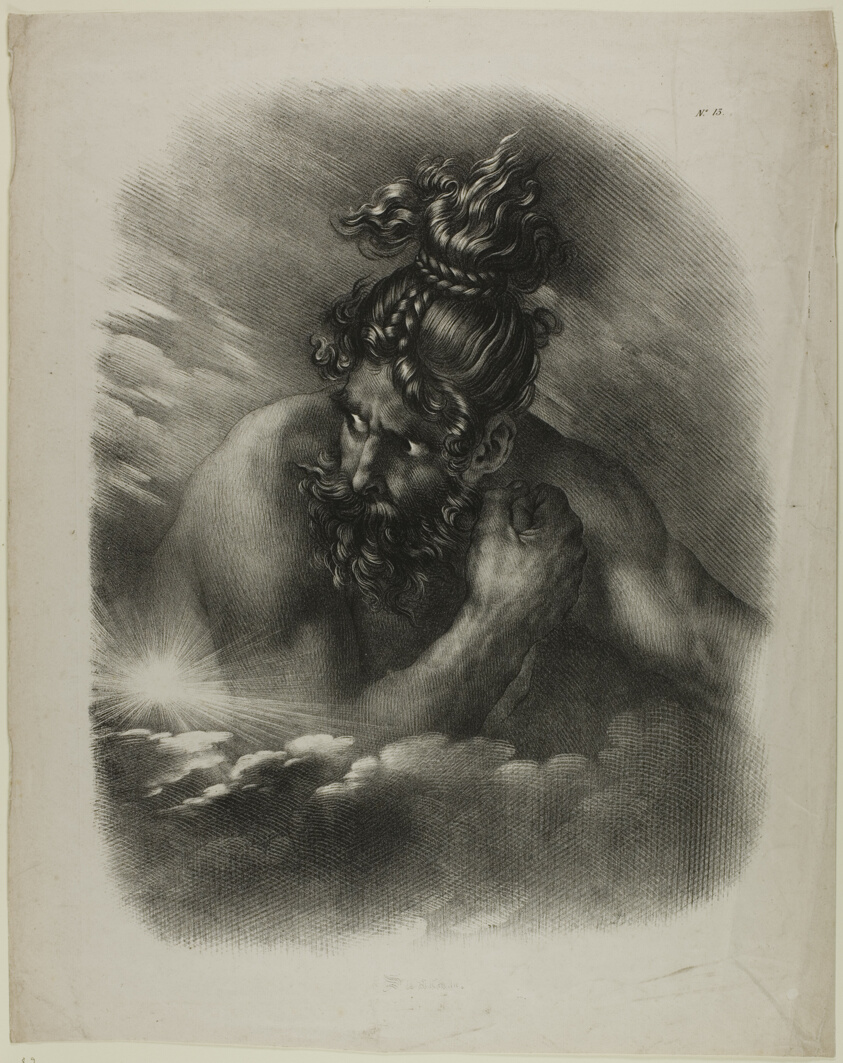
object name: Print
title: Swaran, after The Apotheosis of French Heroes Who Died for Their Country during the War for Liberty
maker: Hyacinthe-Louis-Victor-Jean-Baptiste Aubry-Lecomte (French, 1787-1858); after Anne-Louis Girodet de Roucy-Trioson (French, 1767-1824); printed by Gottfried Engelmann (French, 1788-1839)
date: 1821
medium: Lithograph in black on ivory wove paper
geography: France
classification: lithograph; print; prints and drawing